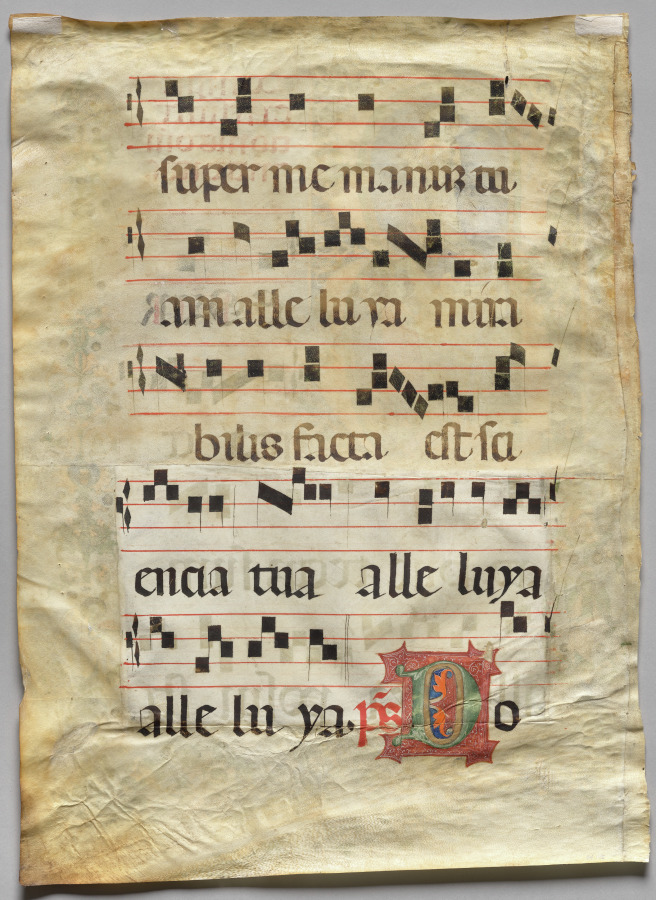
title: Leaf from a Gradual: Historiated Initial R: Initial D (verso)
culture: Italy, Naples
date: mid-1300s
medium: ink, tempera, and gold on parchment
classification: Manuscript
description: This leaf was taken from a gradual, a large volume containing songs for the mass. This single leaf shows the introductory passage for Easter Sunday. The initial R is filled with the representation of the resurrection of Christ. The depiction of Saint Francis of Assisi in the floral decoration points to an origin from a Franciscan monastery. Due to the great plague, the mendicant orders to which the Franciscans belonged were the recipients of civil charitable donations. Naples, where the leaf is said to have been made, was struck by a severe earthquake around the middle of the 1300s, in addition to the plague.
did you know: The Virgin Mary is shown twice on this leaf, once at the top standing to the side of the open tomb and again in bottom border, crowned and holding the infant Christ.